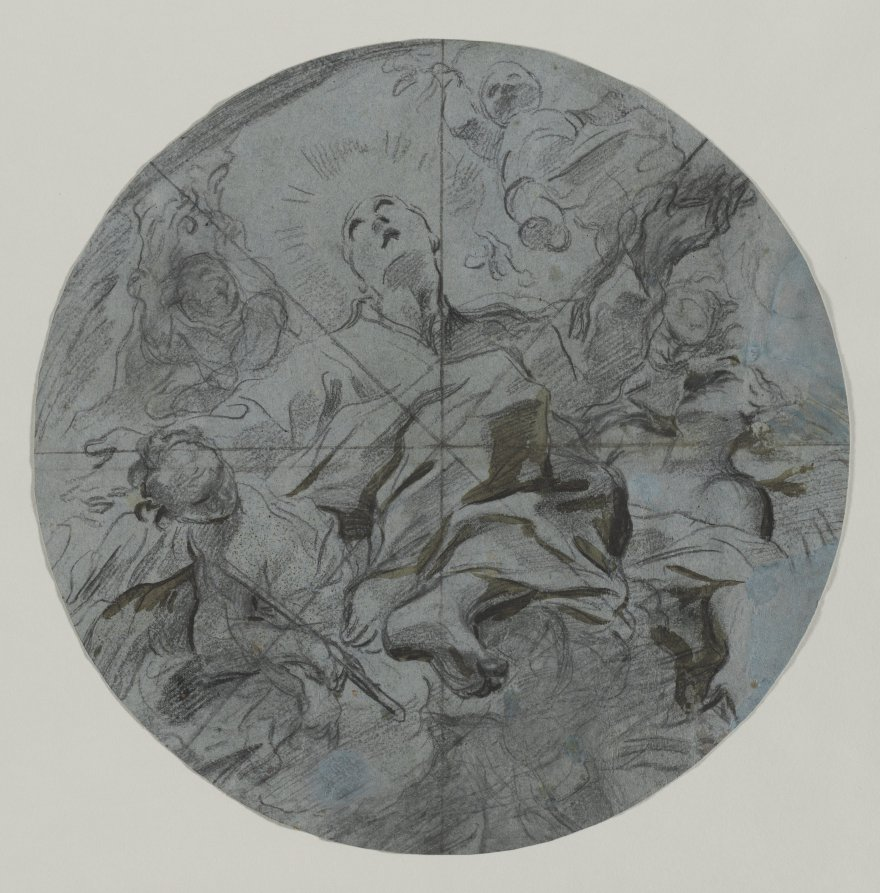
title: Apotheosis of a Saint (recto)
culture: Italy, 17th century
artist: Giovanni Battista Benaschi (Italian, 1636–1688)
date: second half 17th century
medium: black chalk with brush and brown wash; divided into eighths with ruled black chalk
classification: Drawing